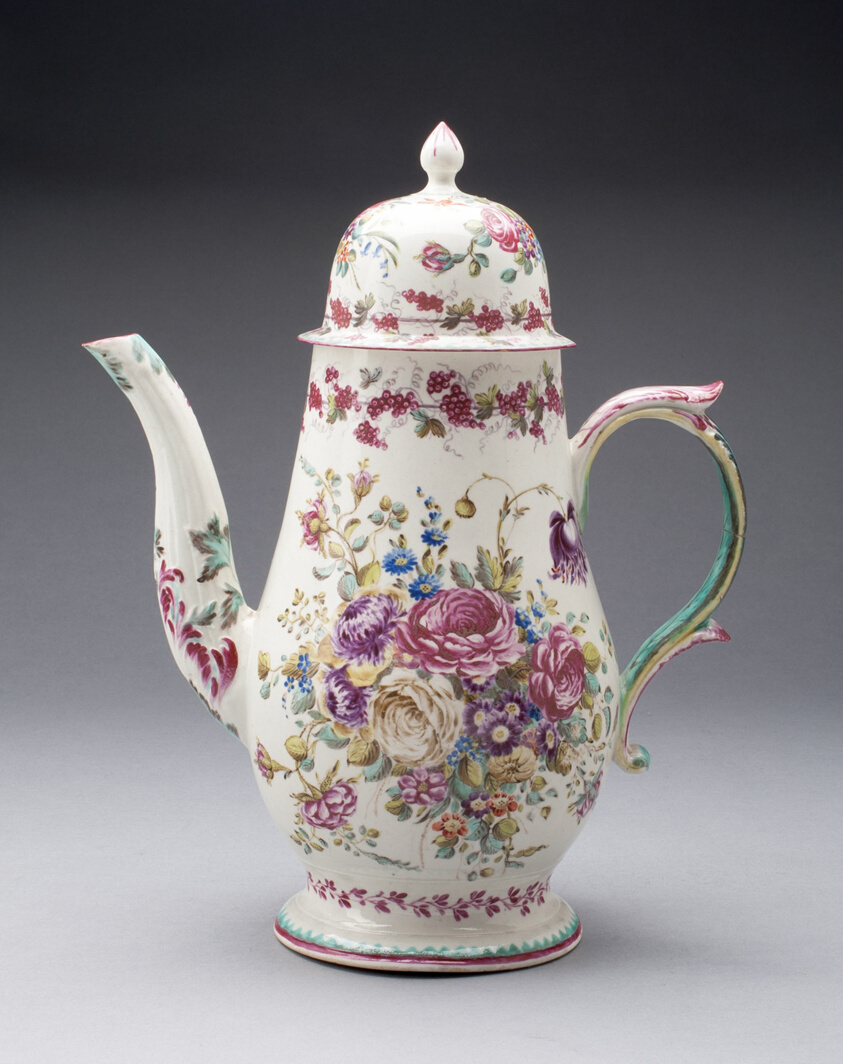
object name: Ceramics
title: Coffee Pot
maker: Bow Porcelain Factory (London, England, 1744-1775)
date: c. 1755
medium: Soft-paste porcelain, polychrome enamels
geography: Bow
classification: porcelain; ceramics; european decorative arts